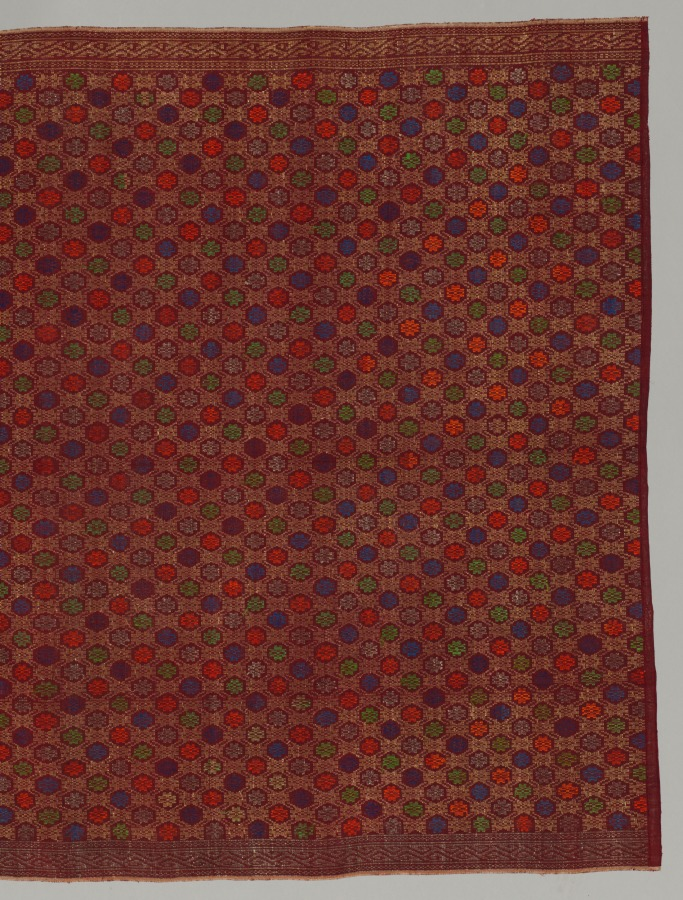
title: Wearing Cloth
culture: Indonesia, Sumatra, Palembang, 1st half 20th century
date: 1900–1950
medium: tabby weave; silk brocaded with silk and metallic threads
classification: Textile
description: The small pattern of rosettes in the main field, the selvage borders, and the tumpal (triangle) border are characteristic of the gold, silver, and red silk cloths woven in the Palembang region. Sumptuous silks of this type were only made in the eastern coastal cities of Sumatra that maintained active trade with China and India. Not only were the silk, gold, and silver threads imported, but the elements of the design were derived from Indian patola (warp and weft ikat) silks. Traditionally, cloths like this were worn for ceremonial occasions and were also used in the exchange of gifts required on the occasion of a wedding.